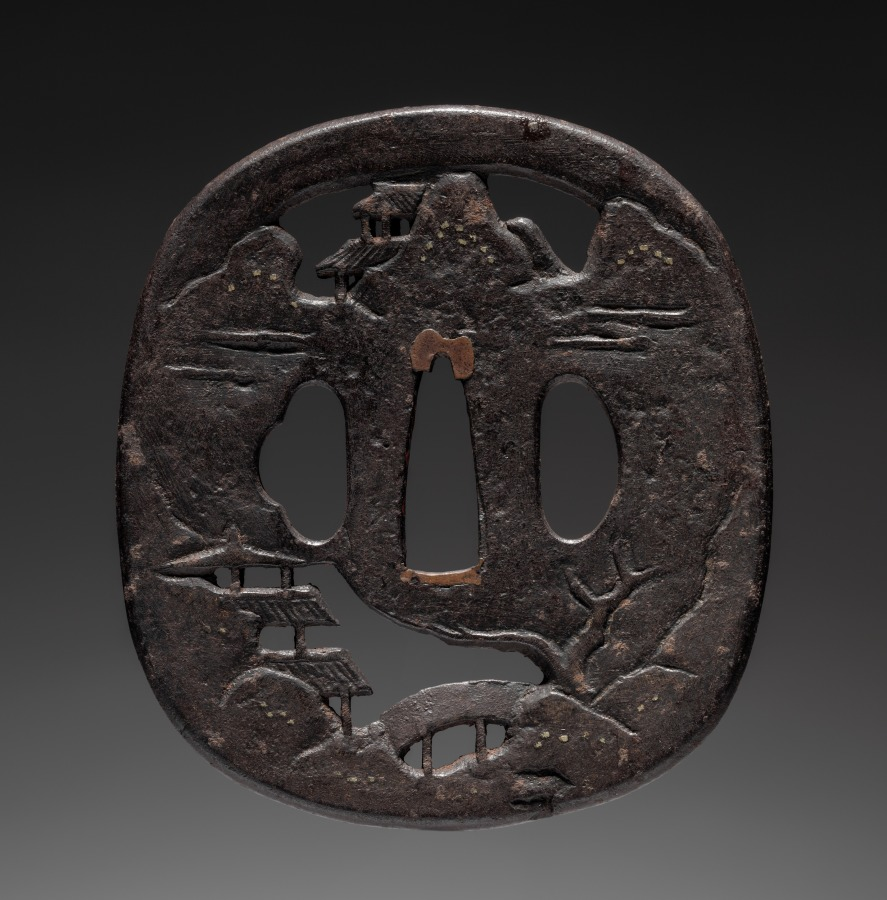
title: Sword Guard (Tsuba) with Chinese Landscape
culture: Japan, possibly Edo period (1615-1868)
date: c. 1615–1868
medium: iron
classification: Arms and Armor